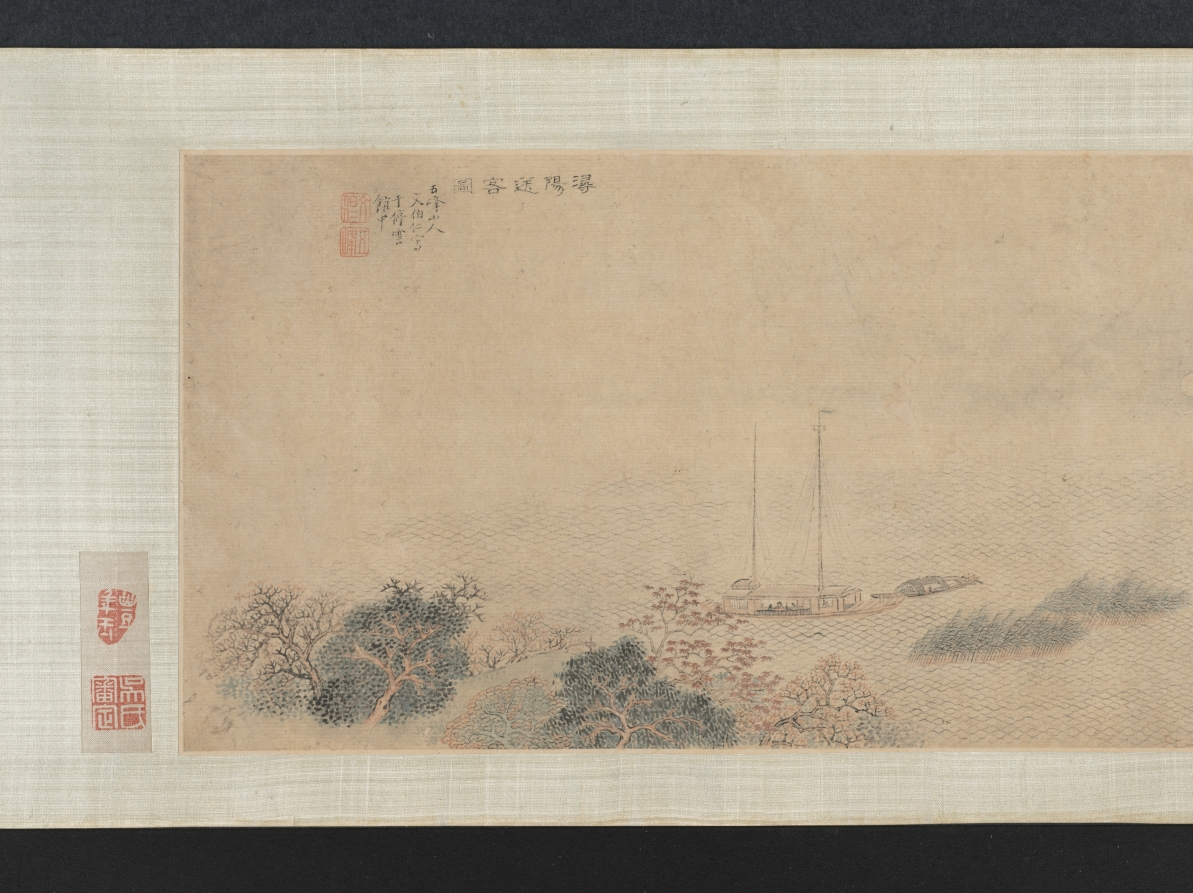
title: Saying Farewell at Xunyang (Song of the Pipa)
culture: China, Ming dynasty (1368–1644)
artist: Wen Boren (Chinese, 1502–1575)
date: 1500s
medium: handscroll, ink and color on paper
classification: Painting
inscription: "潯陽送客圖" 五峰山人文伯仁寫于停雲館中 [印] 文伯仁; 五峰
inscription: 2 colophons and 9 additional seals: 1 transcription of "Pipa xing 琵琶行” (Song of Pipa) and 3 seals of Zhu Yizun 朱彜尊 (1629-1709); 2 seals of Wu Rongguang 吳榮光 (1773-1843); 1 colophon, dated 1826, and 3 seals of Wu Xijia 吳錫嘉 (mid-1700s)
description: This handscroll depicts The Song of the Pipa, a poem by Bai Juyi 白居易 (772–846) written after the poet’s encounter with a pipa player on the Yangzi River. Expelled from her home city when her beauty and fame had faded, she played for the poet at night. Her musical performance and tragic life story resonated with Bai Juyi, who had just been demoted and exiled from life at court himself. The hazy, vast view and pale color tonalities of this painting illustrate these feelings of endless sadness, having lost one’s sense of purpose in life.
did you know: Wen Boren depicted the chilly autumn water with a fishnet pattern.